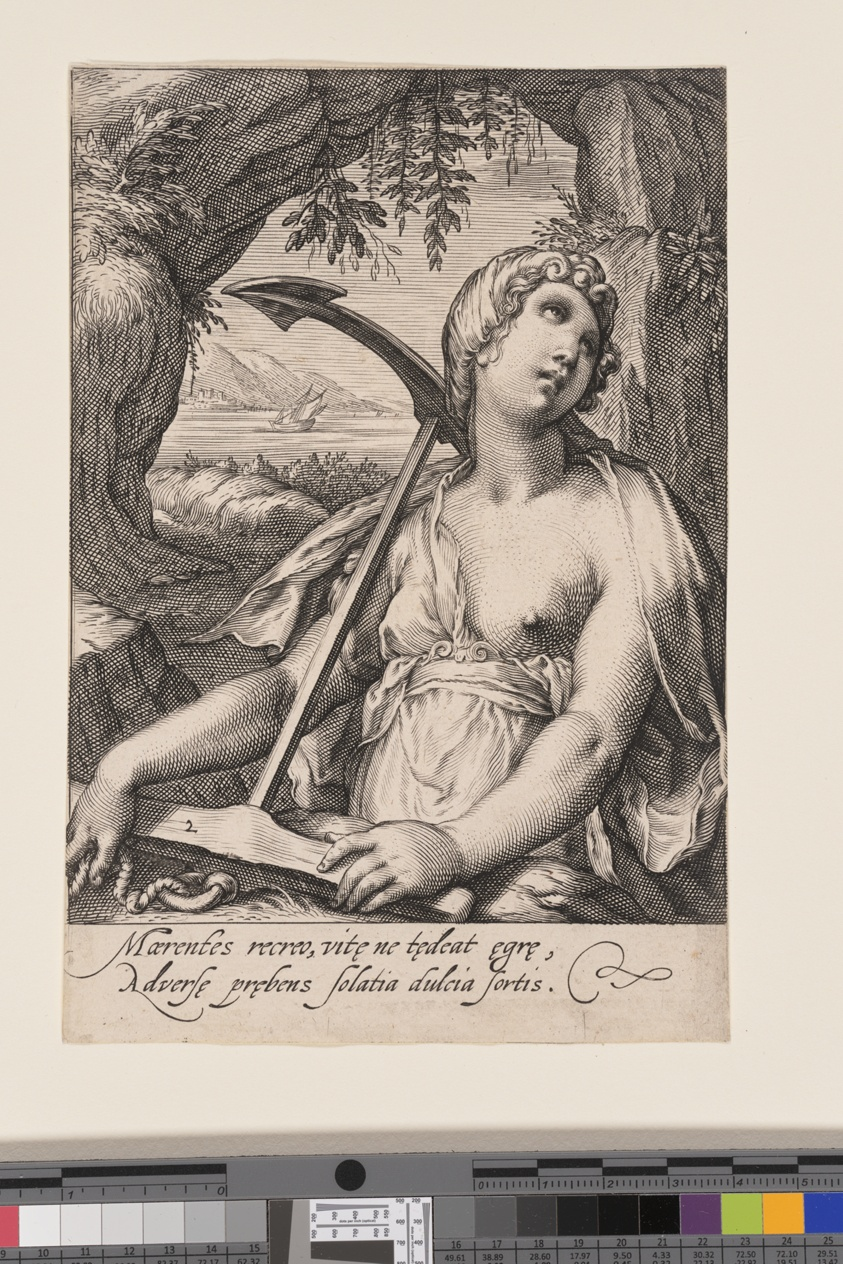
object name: Print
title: Hope, from The Seven Virtues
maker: Jacob Matham (Dutch, 1571–1631); after Hendrick Goltzius (Dutch, 1558–1617)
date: 1597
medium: Engraving on paper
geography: Netherlands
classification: engraving; paper; print; prints and drawing